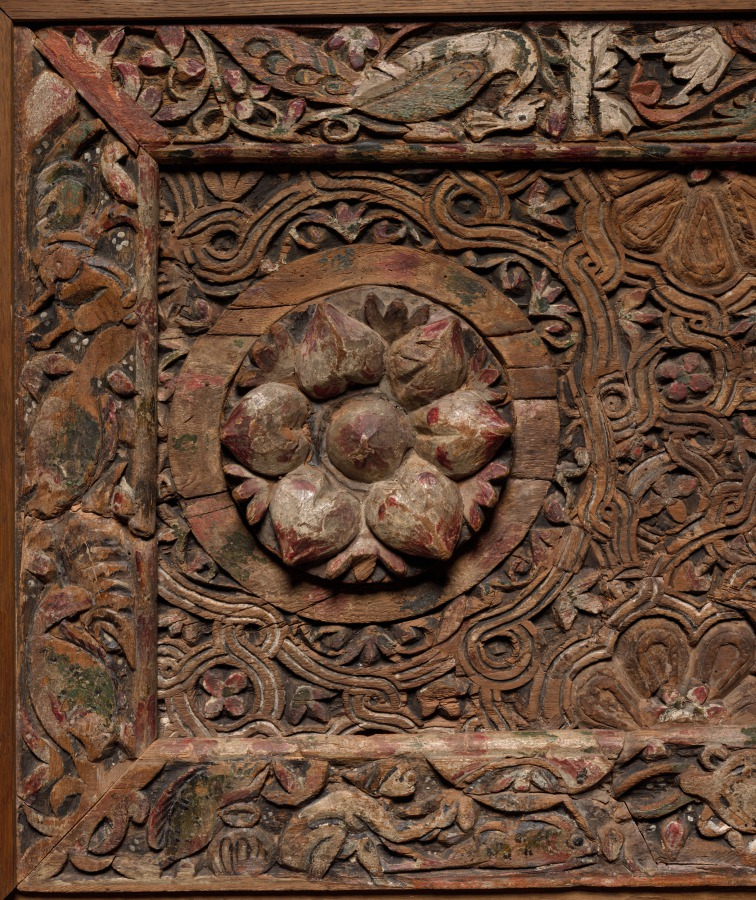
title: Ornamental Panel (from a Ceiling?)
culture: Egypt, Coptic period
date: 500s (frame) and 700s (central panel)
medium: wood with paint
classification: Furniture and woodwork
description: This wooden panel and its frame come from different locations. The four narrow panels forming the outer frame are stylistically datable to the 500s. The large central rectangular panel might date to the 700s. It is most likely a carved ceiling, but its architectural context is unknown. Both panel and frame have been cut down and joined together at some point in their history under unknown circumstances. The decorative program of the main panel features two large rosettes surrounded by florets, leaves, and fruit. The outer frame features two flying angels holding a wreath, a peacock, an octopus, a seated fisherman who holds a long line with a fish attached, and a swimming boy with a dolphin. The vocabulary of the frame is dominated by water life, particularly of the Nile and its banks. Though separated from its original place and altered, this important object provides a welcome glimpse of an architectural interior from early Christian Egypt.